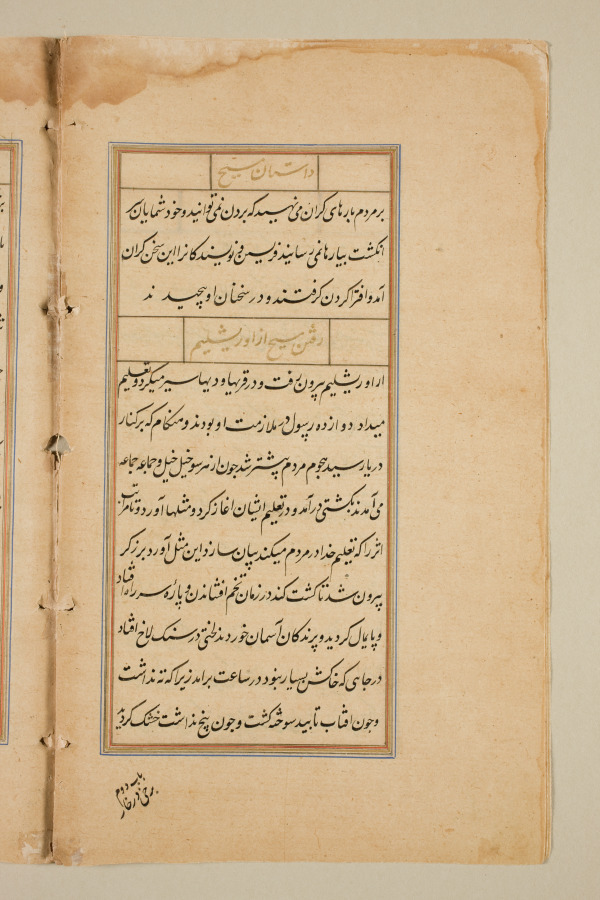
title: Text page from a Mirror of Holiness (Mir’at al-quds) of Father Jerome Xavier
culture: Mughal India, Allahabad, made for Prince Salim (1569–1627)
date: 1602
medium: Ink and gold on paper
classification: Manuscript